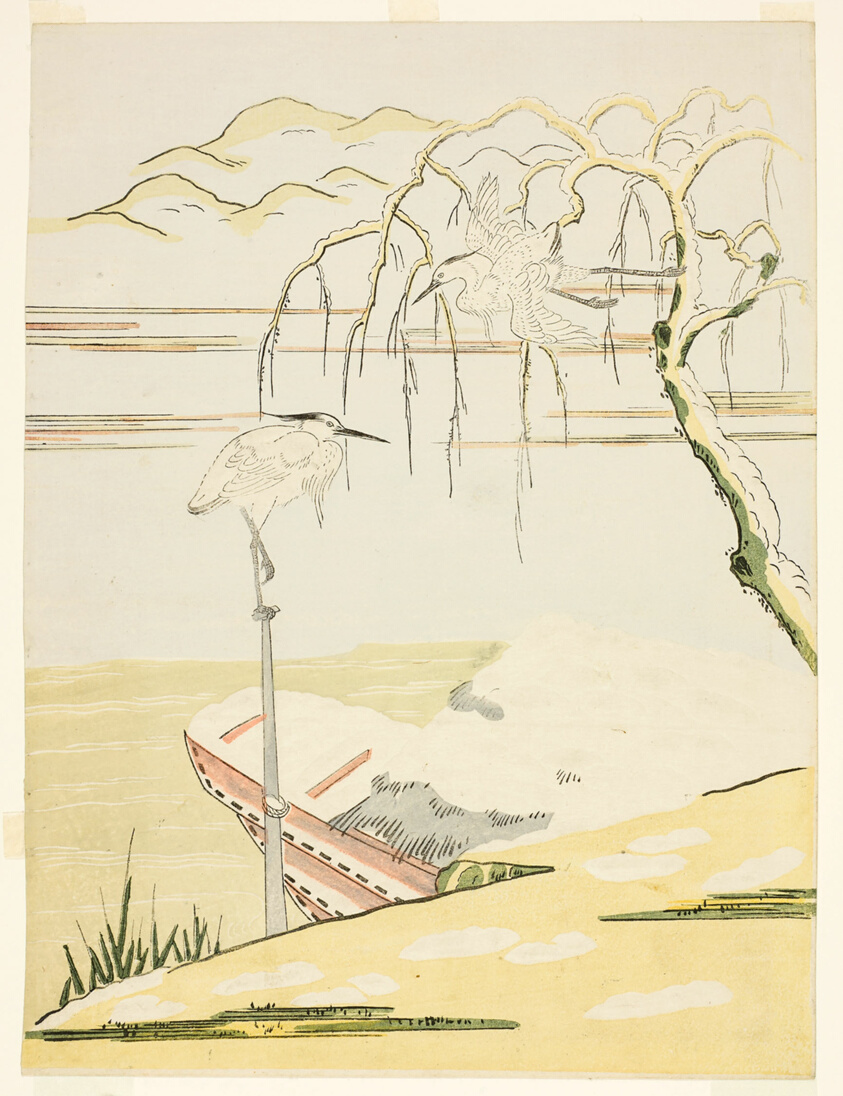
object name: Print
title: Egrets in the Snow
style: Japanese (culture or style)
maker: Attributed to Suzuki Harunobu 鈴木 春信; Japanese, 1725 (?)-1770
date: c. 1768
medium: Color woodblock print; chuban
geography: Japan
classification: woodblock print; print; asian art